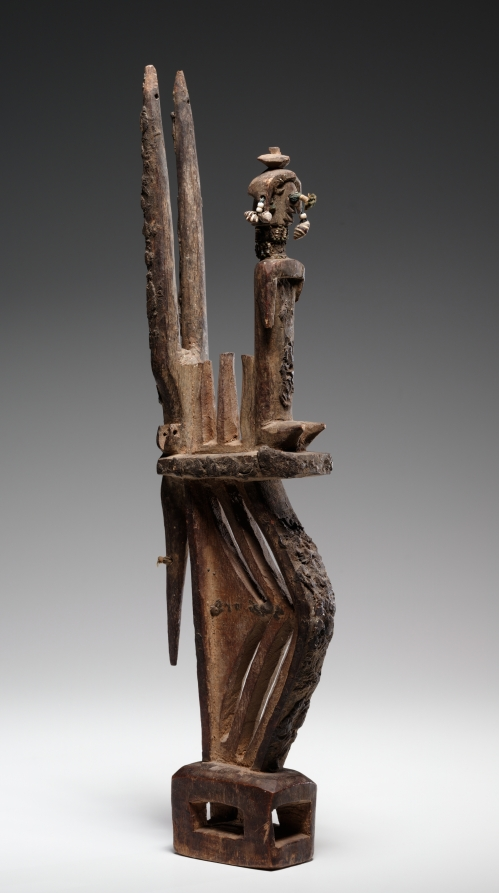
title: Headdress (chi wara)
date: early 1900s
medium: Wood, metal, glass beads, seashells, string, and probably tar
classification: Mask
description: Chi wara—a mythical “farming beast”—was said to teach farming to the Bamana people. Carved patterns cover this female chi wara’s body, highlighting its muscles and emphasizing that it is no earthly animal, but rather an agricultural spirit that combines human, antelope, and anteater elements. This example emphasizes vertical space, with a kneeling human figure on the back. The figure is adorned with imported beads as well as small shells. Accompanied by women’s songs, male performers danced paired male-and-female chi wara headdresses affixed to basketry caps at agricultural competitions and weddings.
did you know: Chi wara headdresses look different depending on the region in which they were made.